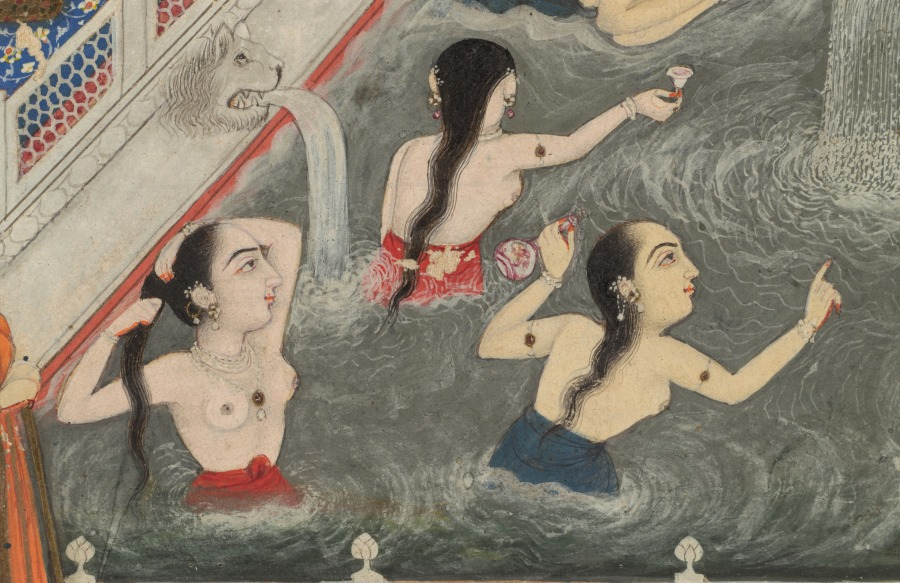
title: Women bathing before an architectural panorama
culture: India, Lucknow, Mughal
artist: Fayzullah (Indian, active c. 1730–1765)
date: c. 1765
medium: Gum tempera and gold on paper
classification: Painting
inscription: Persian inscription in center, on marble balustrade, in nasta‘liq script: The work of Fayzullah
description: Despite the wars waged and forts besieged in the background, life in the palace is carefree and luxurious. Some women enjoy hookahs and music on balconies, while others swim and drink liquor with abandon from Chinese porcelain cups and bottles. The artist has placed his name under the central pavilion, observing the scene across a formal garden of marigolds. The artist seems to have enjoyed experimenting with the idea of perspective, learned from European sources. He created a rapidly receding space that telescopes the view from the intimate harem quarters to the distant battlefields.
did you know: The artist signed his name below the king’s seat that overlooks the garden vista.